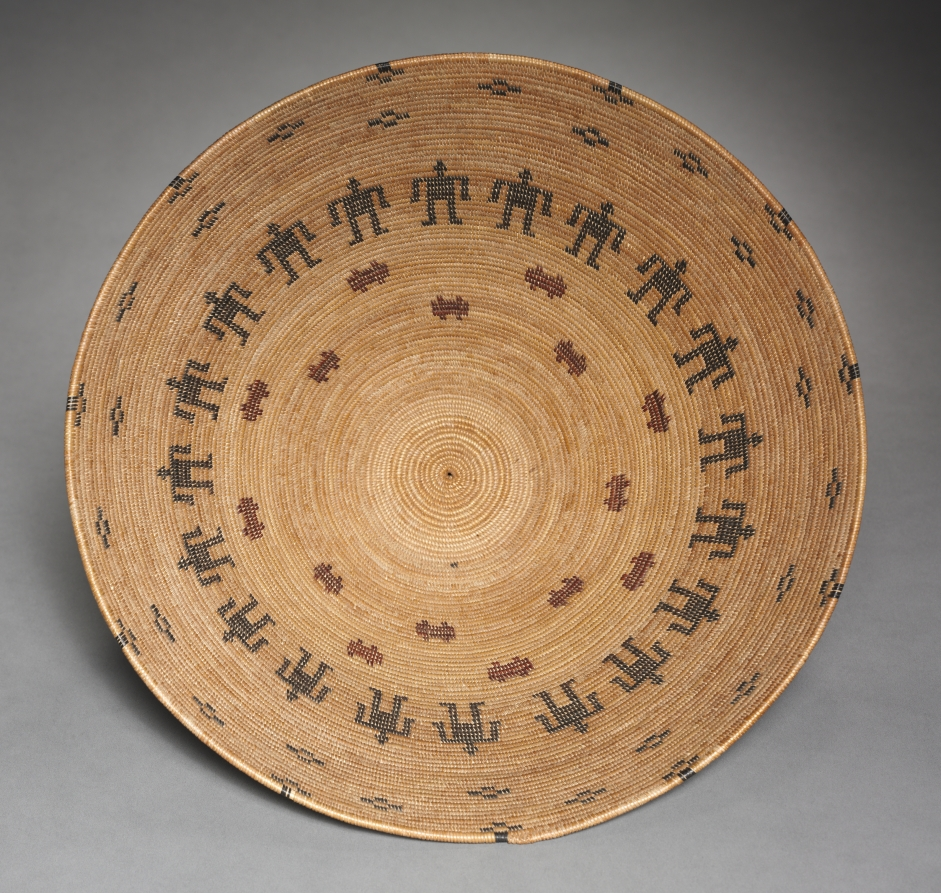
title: Bowl Basket (Unfinished)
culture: California, Yokuts, late 19th- early 20th century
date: 1895–1900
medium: Redbud, sedge, bracken fern; coiled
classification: Basketry